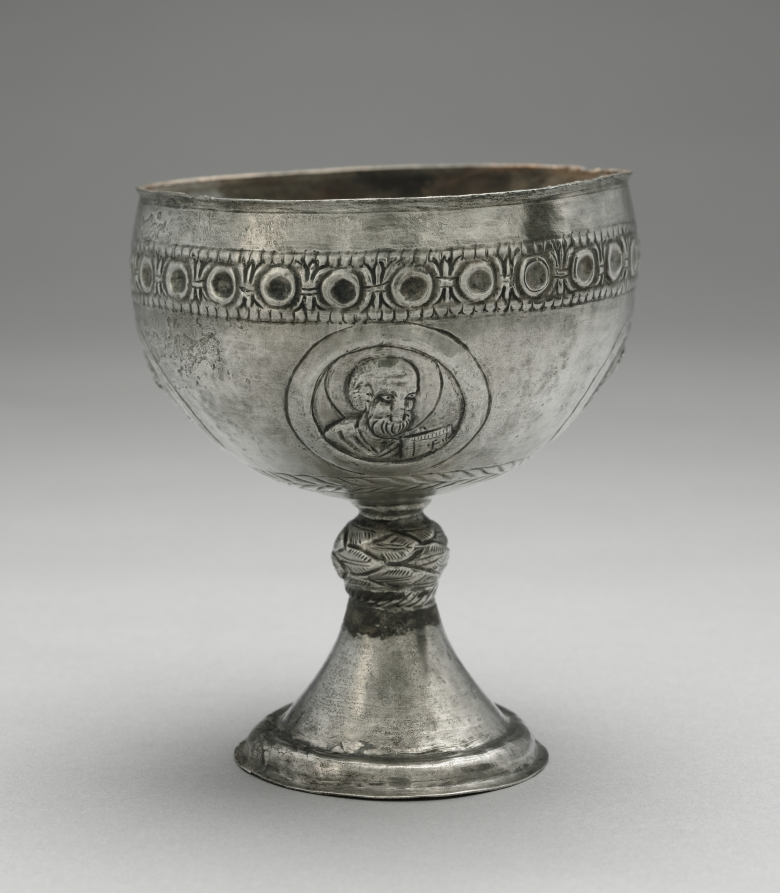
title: Chalice from the Beth Misona Treasure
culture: early Byzantium, Constantinople or Syria, Byzantine period, 6th-7th Century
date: c. 500–700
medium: silver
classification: Metalwork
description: These four liturgical silver vessels—a paten and three chalices (1950.378–81)—form what is now called the Beth Misona Treasure, named for the village in northern Syria for which the objects were made. While nothing is known about the exact location and circumstances of the treasure's discovery, the people of the village of Beth Misona were, like other Christian communities in Syria and Palestine, probably forced to bury their church silver to hide it from the Persians or Arabs, who conquered their lands in the first half of the 600s. The paten, which held pieces of Eucharistic bread used during Mass, is decorated with an engraved Latin cross surrounded by a dedicatory inscription that names the paten's donor—Domnos—and its original location, the church of Saint Sergios in Beth Misona. The chalices, which contained the Eucharistic wine used during Mass, feature broad cups decorated with portrait busts of Saints Peter and Paul, Christ, and the Virgin. One chalice bears a dedicatory inscription naming its donor—Kyriakos, Domnos's son—and the priest of the church that received the pious gift—Zeno.